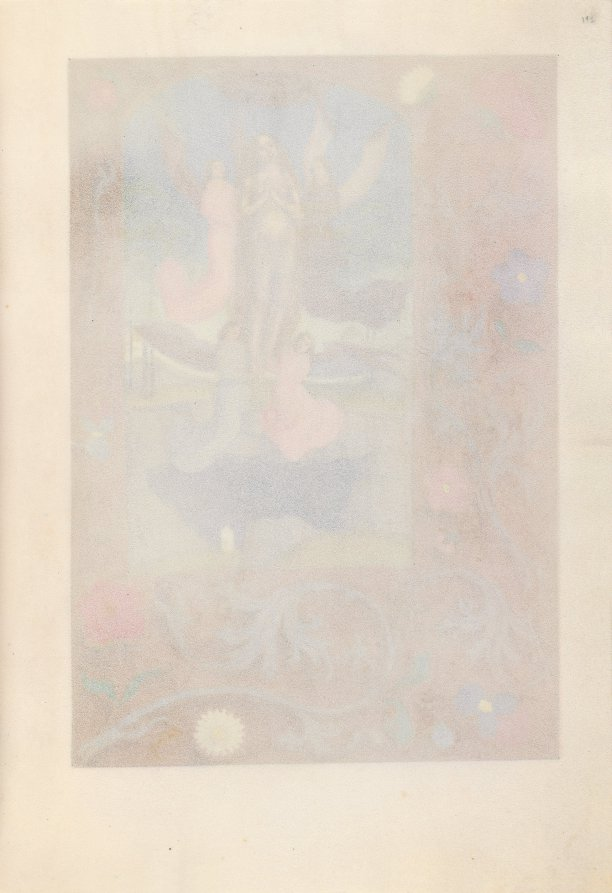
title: Hours of Queen Isabella the Catholic, Queen of Spain: Fol. 193r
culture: Flanders, Ghent and Bruges, late 15th century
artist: Master of the First Prayerbook of Maximillian (Flemish, c. 1444–1519)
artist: and Associates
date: c. 1500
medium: ink, tempera, and gold on vellum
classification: Bound Volume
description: This manuscript was illuminated by a circle of at least five highly organized manuscript painters active in the Flemish cities of Ghent and Bruges. The principal illuminator was Alexander Bening, who painted the majority of the book's miniatures. Manuscripts produced by this circle of artists are renowned for the decoration of their borders, which typically feature a rich variety of realistically-painted flowers, birds, and butterflies. This prayer book, called a book of hours, was intended not for a cleric, but for the private devotions of a lay person-in this case, Isabella the Catholic, Queen of Spain (1451-1504). Isabella's coat of arms embellishes the book's frontispiece. It is unlikely that the book was commissioned by the Queen herself; rather, she probably received it as a diplomatic gift from someone courting her patronage, perhaps Cardinal Francisco Jimenez de Cisneros. A Franciscan friar, Jimenez was dependent upon Isabella for his advancement, first to the post of Queen's confessor in 1492, and then to Archbishop of Toledo in 1495.